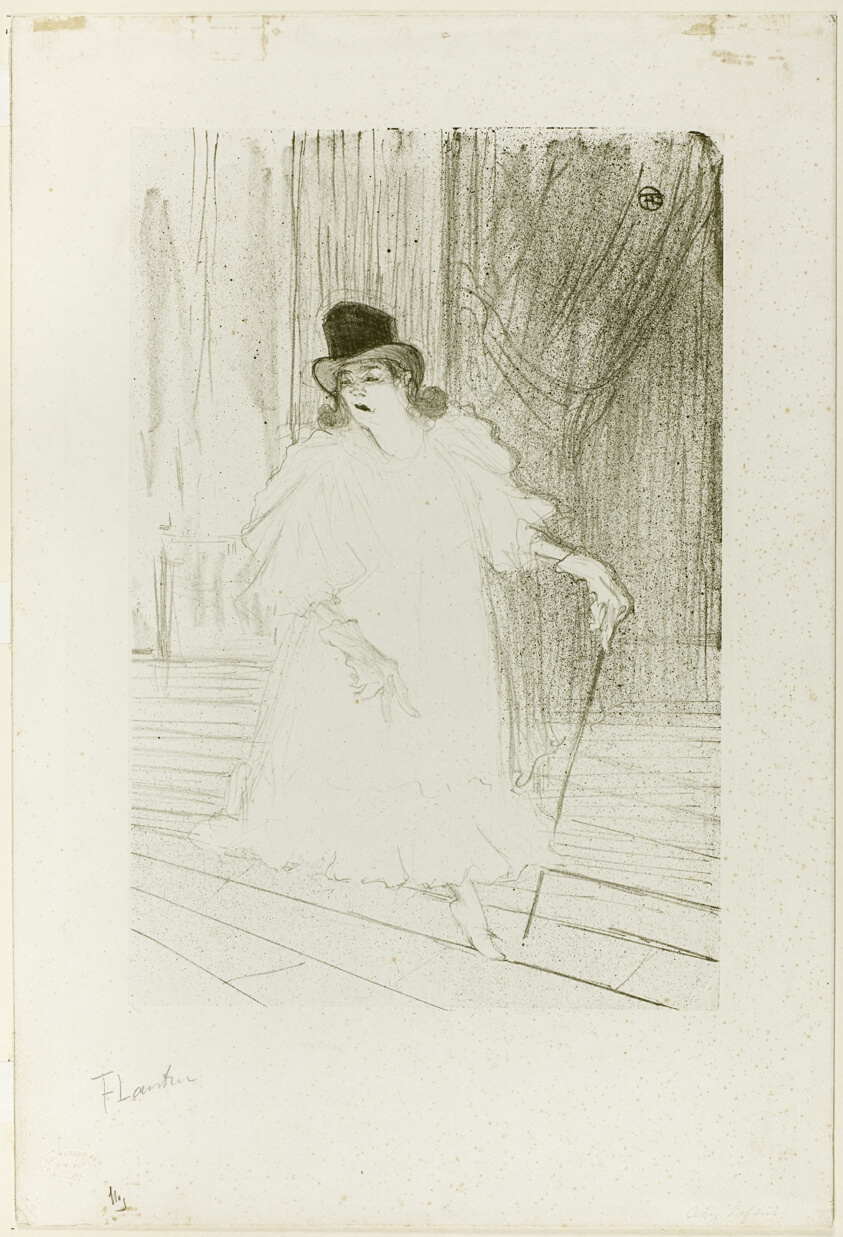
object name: Print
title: Cecy Loftus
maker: Henri de Toulouse-Lautrec (French, 1864-1901)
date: 1895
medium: Color lithograph on ivory wove paper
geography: France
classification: lithograph; print; prints and drawing